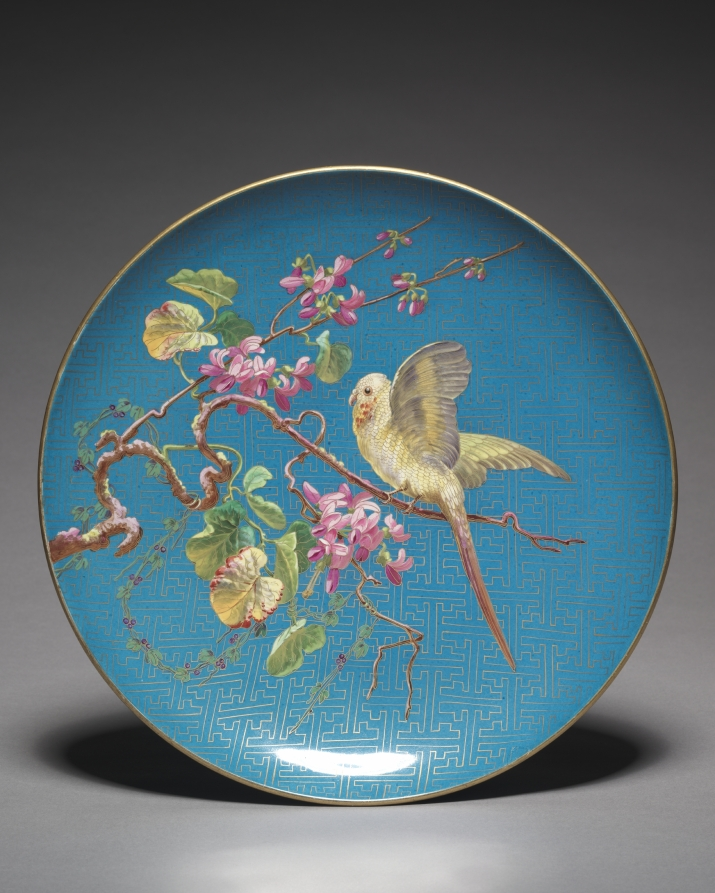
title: Charger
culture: France, 19th century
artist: Daubron frères (French)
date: 1878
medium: glazed and gilt earthenware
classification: Ceramic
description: This decorative charger is an exceptional example of the Japanese taste in 19th-century French decorative arts. Influenced by cloisonné exported by Japan when the country opened it borders to the West in the 1850s, this charger features parrots in lush foliage before a blue background that imitates cloisonné. The exceptional nature of the enamel decoration is due to the fact that this charger was created by Daubron Frères for exhibition at the 1878 Paris world's fair. An inscription on the back documents the inclusion of this particular piece in the fair.